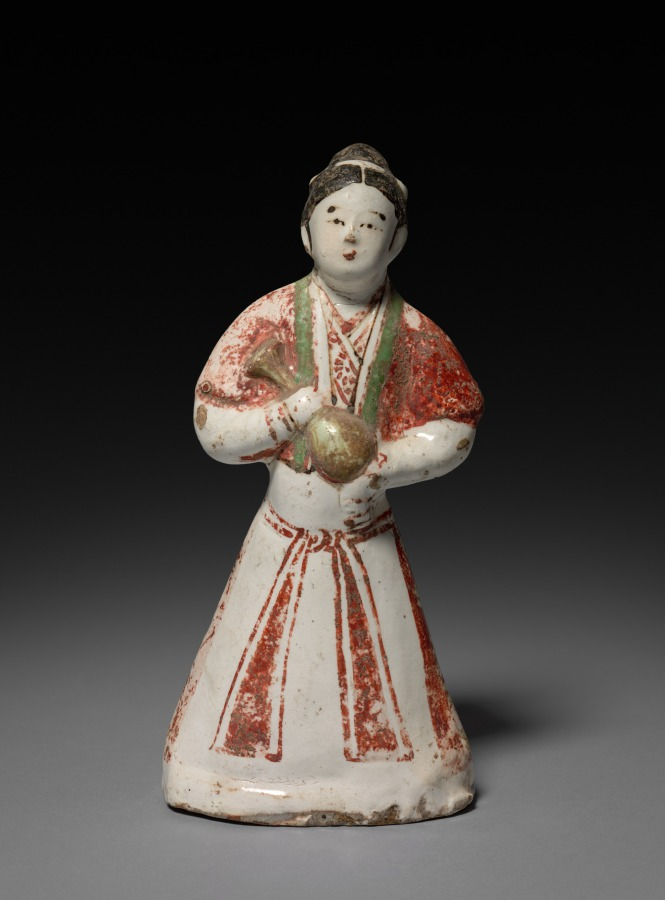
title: Lady Holding a Vase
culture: China, Northern Song dynasty (960-1127) - Jin dynasty (1115-1234)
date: 1100s–1200s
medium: Stoneware with slip decoration, Cizhou ware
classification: Ceramic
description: The Cizhou ware kilns never produced for the imperial court, but made potted utensils needed in daily life. They also fired ceramic figurines, which are believed to have been used as toys. The maid or palace lady here holds a long-necked vase of a type that watered flowers. The figurine, perhaps made as a toy for a girl, was molded in clay and covered with a white slip and transparent glaze, over which some colors in red, green, and ocher were applied. Cizhou kiln potters were one of the first in China who applied overglaze enamel-like colors on glazed, high-fired ceramics.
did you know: This hollow stoneware figure of a woman has firing hole visible at the bottom.